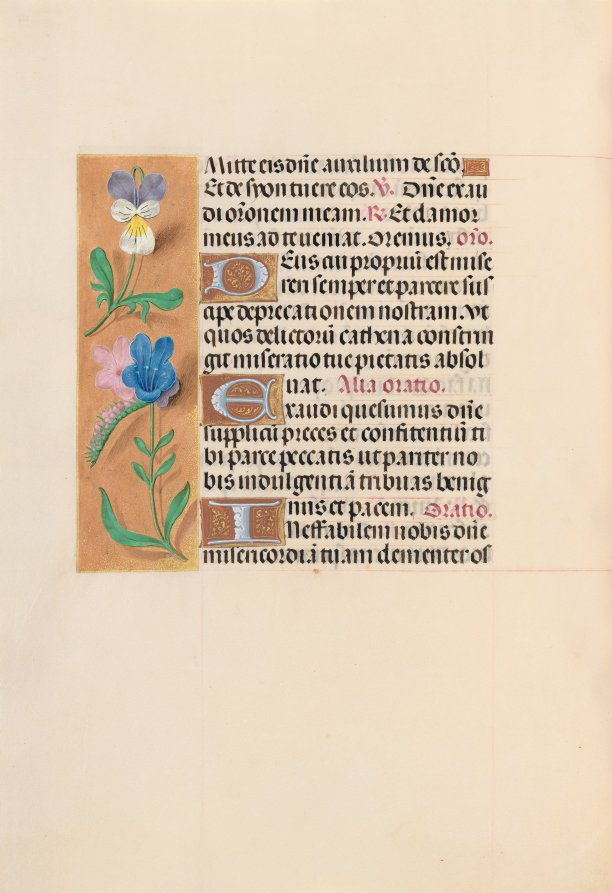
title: Hours of Queen Isabella the Catholic, Queen of Spain: Fol. 216v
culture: Flanders, Ghent and Bruges, late 15th century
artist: Master of the First Prayerbook of Maximillian (Flemish, c. 1444–1519)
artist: and Associates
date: c. 1500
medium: ink, tempera, and gold on vellum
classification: Bound Volume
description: This manuscript was illuminated by a circle of at least five highly organized manuscript painters active in the Flemish cities of Ghent and Bruges. The principal illuminator was Alexander Bening, who painted the majority of the book's miniatures. Manuscripts produced by this circle of artists are renowned for the decoration of their borders, which typically feature a rich variety of realistically-painted flowers, birds, and butterflies. This prayer book, called a book of hours, was intended not for a cleric, but for the private devotions of a lay person-in this case, Isabella the Catholic, Queen of Spain (1451-1504). Isabella's coat of arms embellishes the book's frontispiece. It is unlikely that the book was commissioned by the Queen herself; rather, she probably received it as a diplomatic gift from someone courting her patronage, perhaps Cardinal Francisco Jimenez de Cisneros. A Franciscan friar, Jimenez was dependent upon Isabella for his advancement, first to the post of Queen's confessor in 1492, and then to Archbishop of Toledo in 1495.